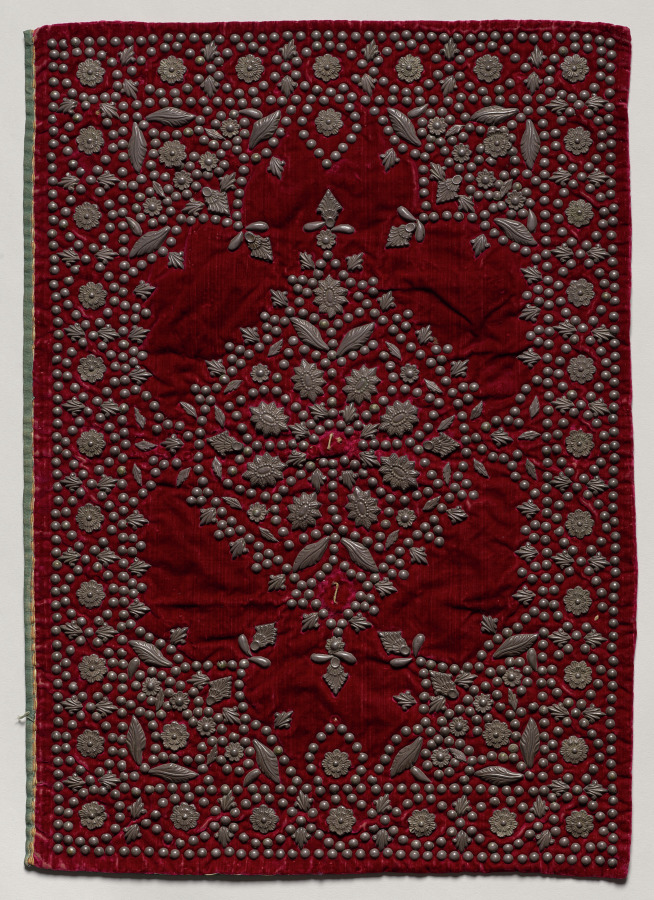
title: Embroidered Velvet Rectangle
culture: India, 19th century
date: 1800s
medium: embroidery; silk and gold filé on linen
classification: Embroidery